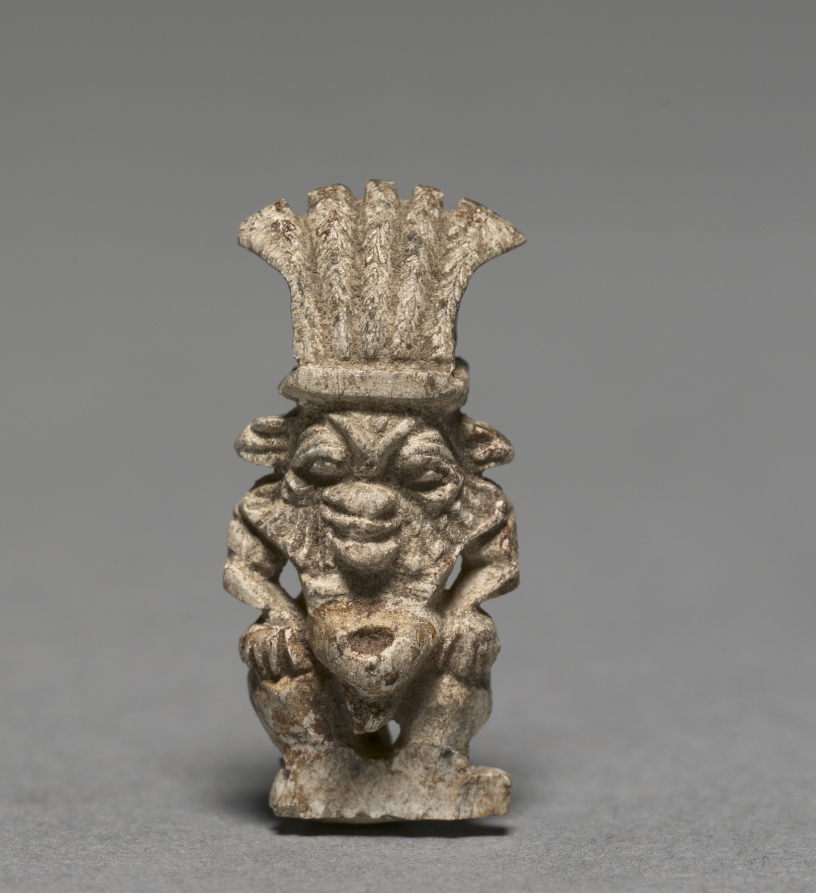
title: Amulet of Bes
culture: Egypt, Late period (715–332 BCE), Dynasty 27–Second Persian period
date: 525–332 BCE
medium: gray steatite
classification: Amulets